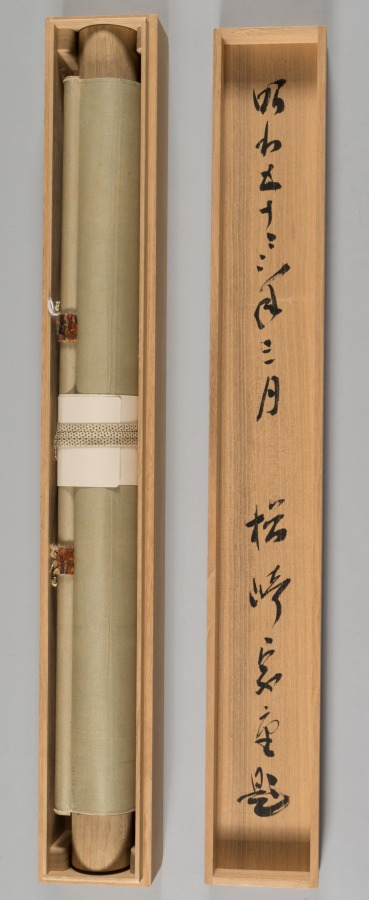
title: A Couple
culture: Japan, Momoyama period (1573–1615)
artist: Hasegawa Sōen (Japanese)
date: late 1500s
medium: hanging scroll; ink on paper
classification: Painting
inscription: Artist's seal at lower left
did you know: The person on the right holds a spray of chrysanthemums, while the other has daffodils suspended upside down from a stalk held over their shoulder.